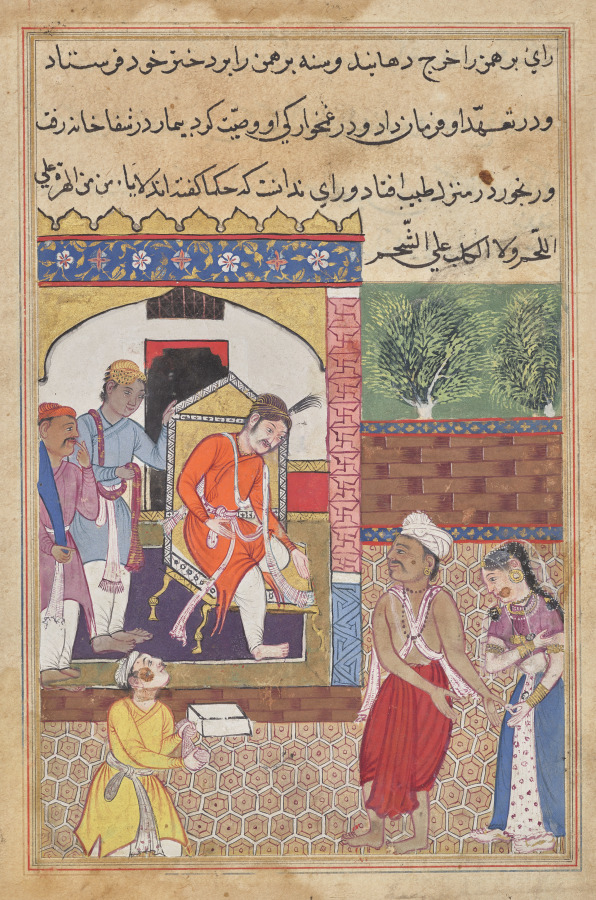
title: The magician, disguised as a Brahman, visits the king of Babylon, from a Tuti-nama (Tales of a Parrot): Thirty-fifth Night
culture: Mughal India, court of Akbar (reigned 1556–1605)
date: c. 1560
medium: gum tempera, ink, and gold on paper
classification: Painting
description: The king of Babylon, seated on a throne, receives the Brahman in the form of a woman and the magician in the form of a Brahman. The king agrees to keep the woman (the transformed Brahman) temporarily in his harem as a favor to the Brahman (the disguised magician). Scholars have identified this image as a portrait of Akbar, the third Mughal emperor of India, and the commissioner of this manuscript. He is thought to be identifying himself as the king of Babylon, regarded in the Islamic world as an ancient center of power and culture. In this story, however, the king fell victim to the trickery of his own daughter, her lover, and the magician, making one wonder why Akbar would choose to portray himself in this guise. The identification of this image as a portrait of Akbar remains unresolved.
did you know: The transformed Brahman, who is in the form of the woman, carries a magical bead in his mouth.